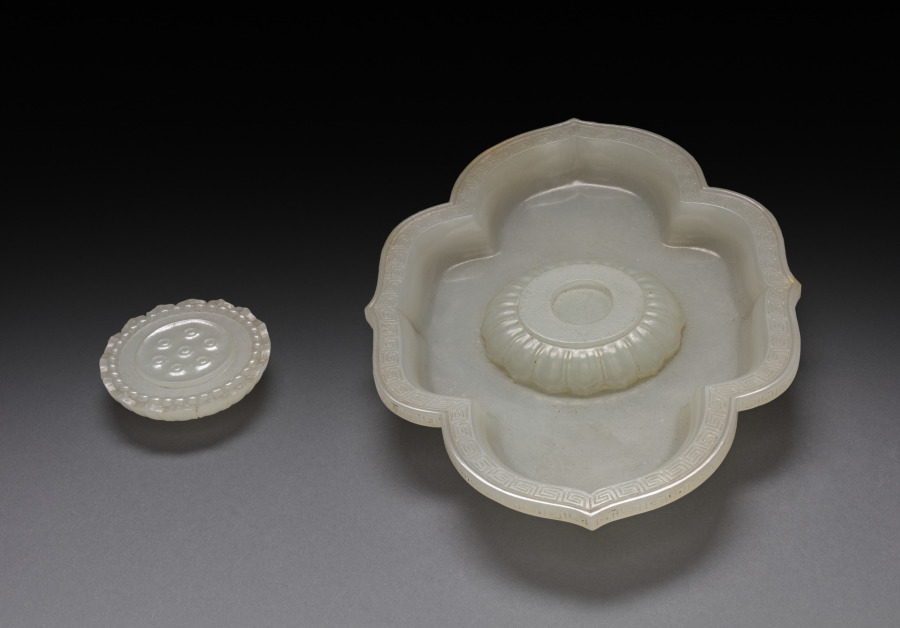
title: Lotus-shaped Dish and Cup (dish)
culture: China, Qing dynasty (1644–1911), Qianlong reign (1736–95)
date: 1736–95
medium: jade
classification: Jade